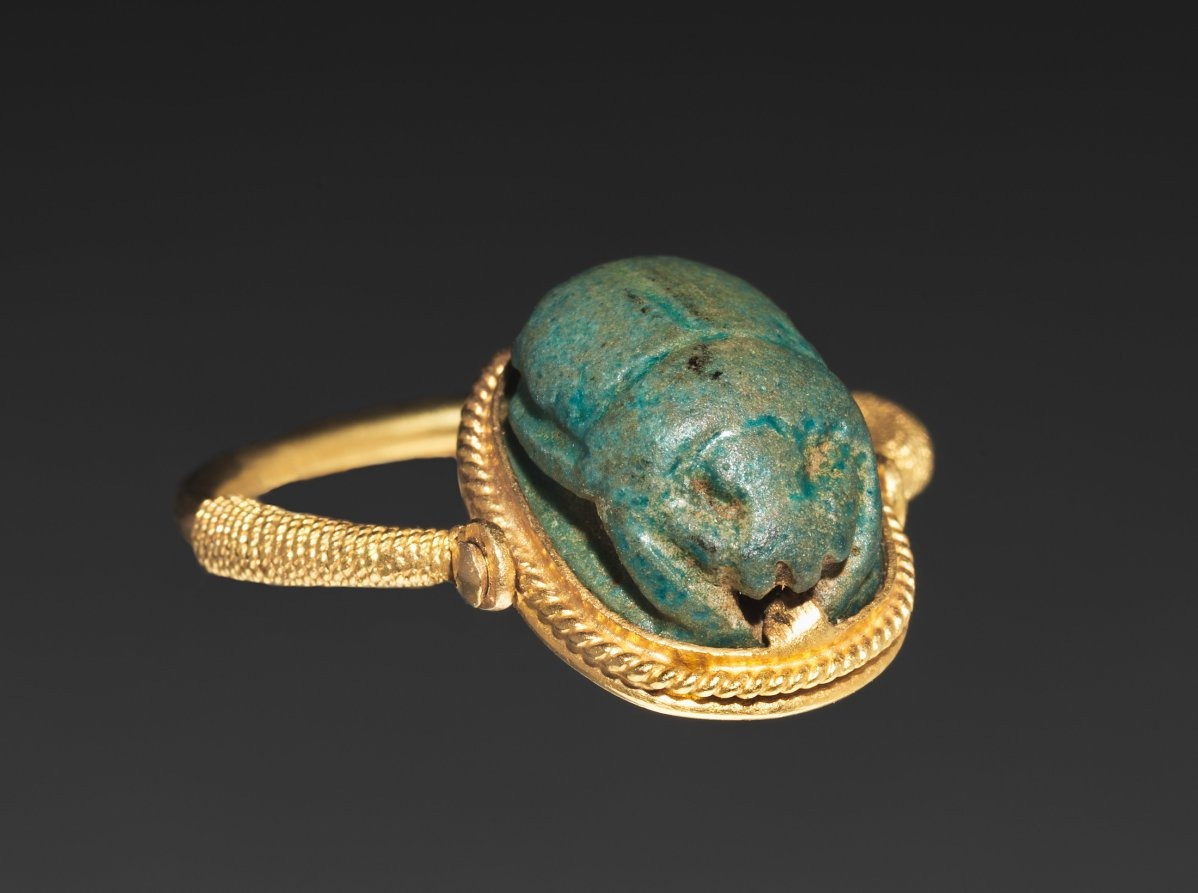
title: Scarab Ring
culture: Egypt, New Kingdom (1540–1069 BCE)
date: 1540–1069 BCE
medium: turquoise faience (mounted on swivel bezel in modern gold ring)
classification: Scarabs